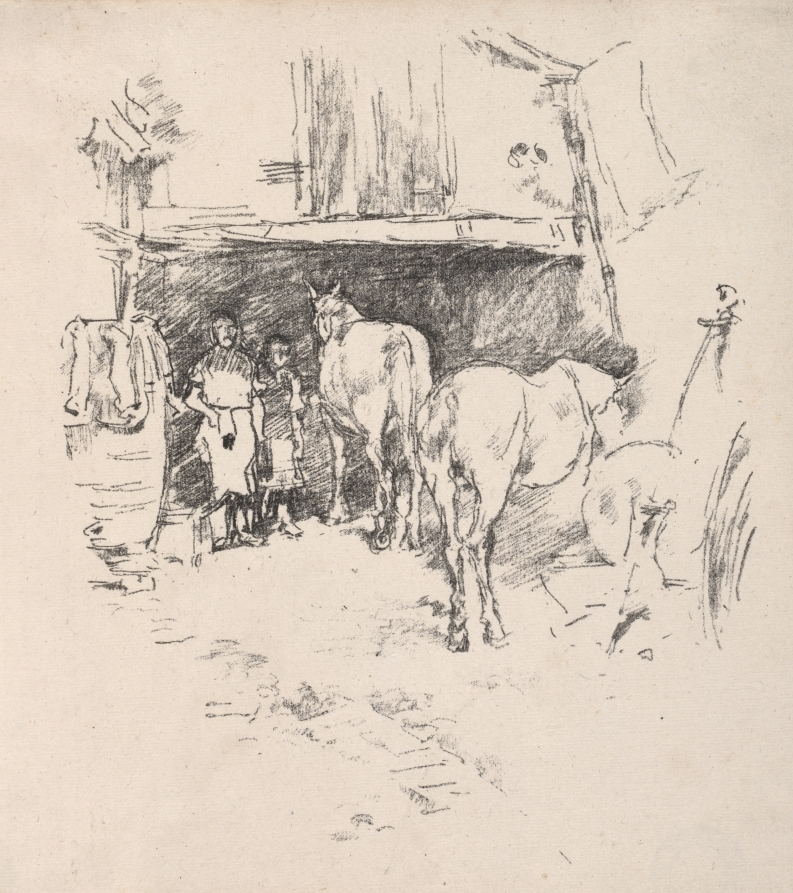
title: The Smith's Yard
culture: America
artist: James McNeill Whistler (American, 1834–1903)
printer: Thomas Robert Way (British, 1861–1913)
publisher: The Studio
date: 1895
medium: transfer lithograph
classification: Print